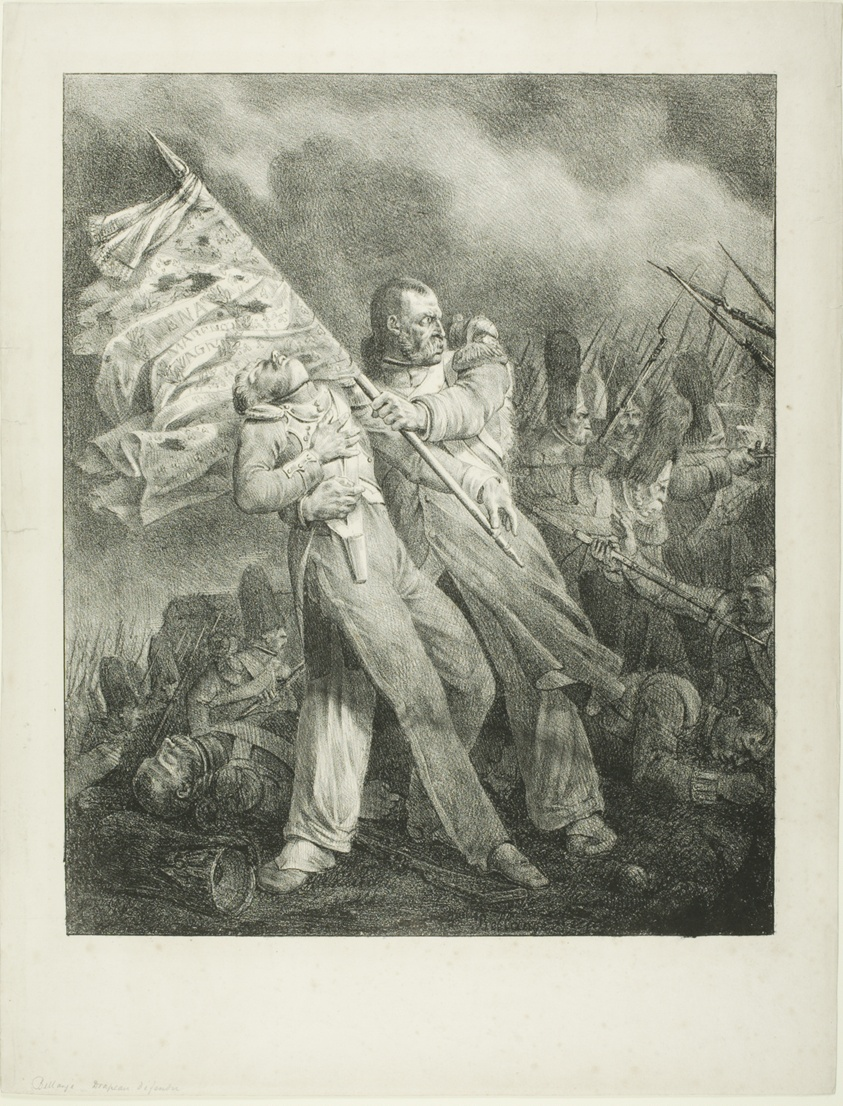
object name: Print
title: The Wounded Standard-Bearer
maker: Hippolyte Bellangé (French, 1800-1866)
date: 1823–35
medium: Lithograph in black on cream wove paper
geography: France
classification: lithograph; print; prints and drawing